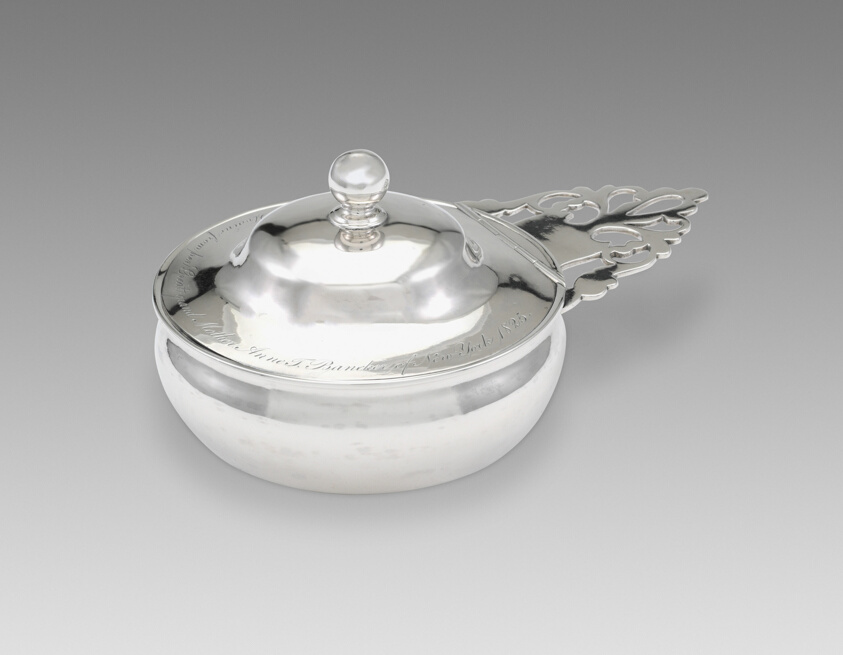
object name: Metalwork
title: Covered Porringer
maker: Horace Seymour Hinsdale; American, 1782–1858; John Taylor Jr.; American, active 1805–1830; New York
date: 1825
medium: Silver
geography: New York City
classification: dish (vessel); vessel for serving food; silver; american decorative arts; american arts; decorative arts